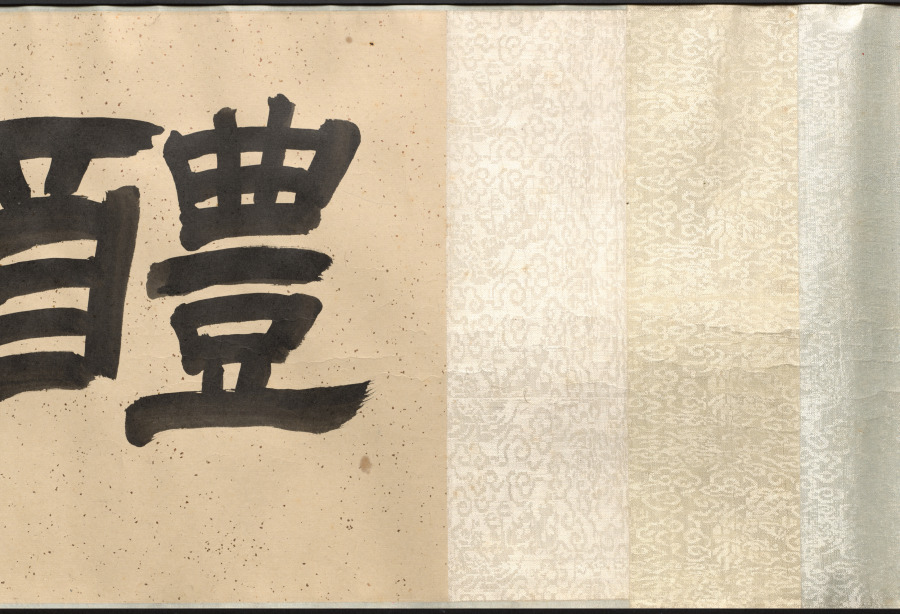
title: Rocks, Orchid, and Bamboo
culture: China, Qing dynasty (1644-1911)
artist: Shitao (Chinese, 1642–1707)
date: 1662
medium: handscroll; ink on paper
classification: Painting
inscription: Title colophon in four characters with signature and two seals on gold-flecked paper.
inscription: Artist's signature, inscription (with date of 1662), five seals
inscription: Colophon with two seals.